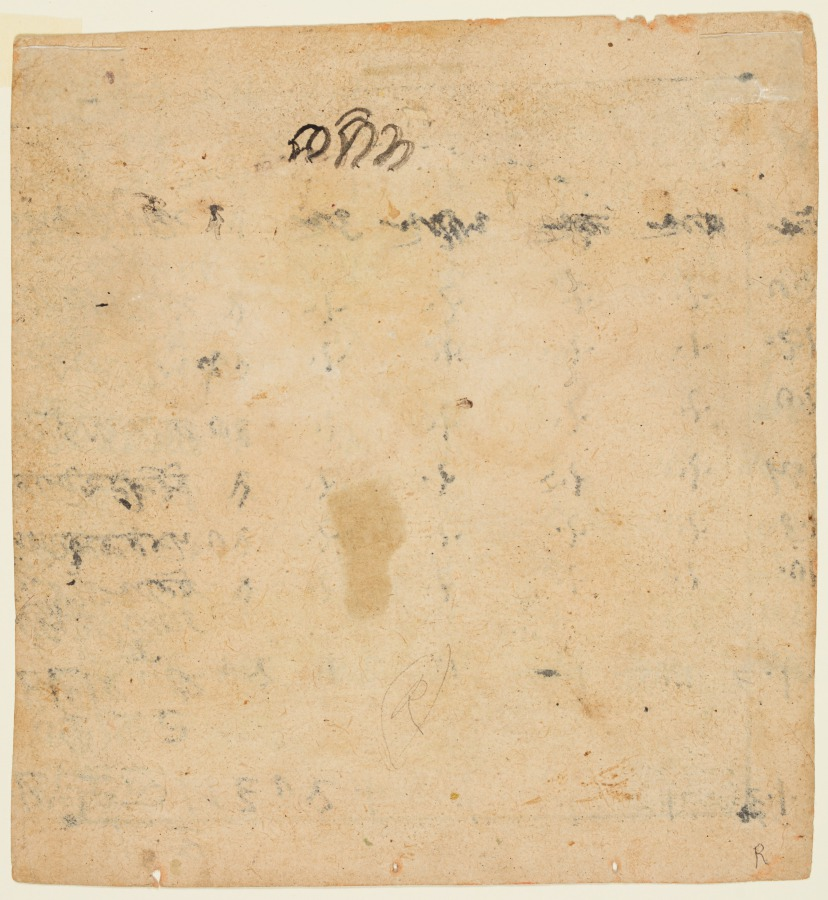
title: A couple seated against two pillows engaged in sex, from an erotic series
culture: Northern India, Pahari kingdoms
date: c. 1700–1710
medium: gum tempera on paper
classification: Painting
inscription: asēm (?)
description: Erotic paintings were commissioned by the patrons of painting, at times for educational purposes, mostly for pleasure. The artists would seek inspiration for the peculiar sexual positions from ancient texts such as Kamasutra and Kokashastra. In the painting, a woman rests on the lap of her paramour while their position is supported by two large bolsters put against the wall.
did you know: Yellow pigment has been used for jewelry instead of gold.